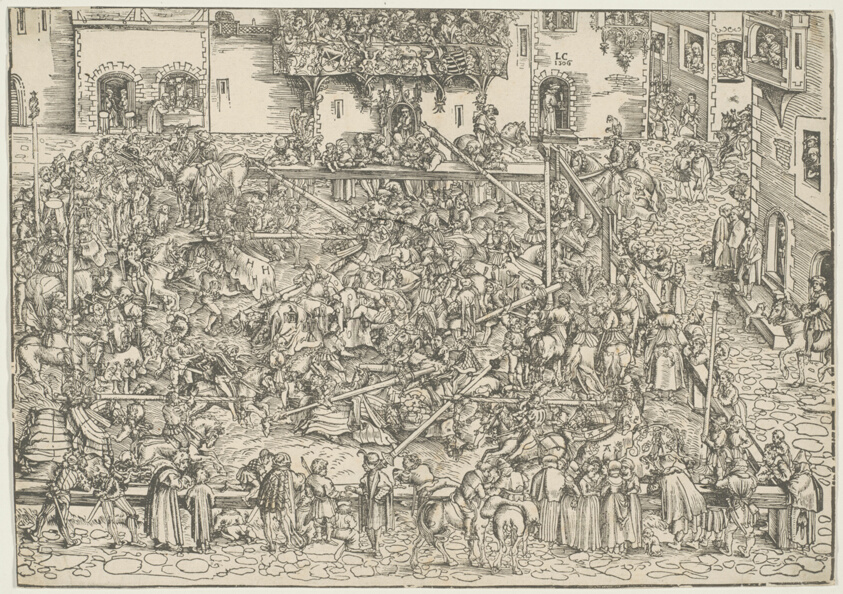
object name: Print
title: The First Tournament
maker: Lucas Cranach the Elder (German, 1472-1553)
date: 1506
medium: Woodcut in black on ivory laid paper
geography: Germany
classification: woodcut; print; prints and drawing